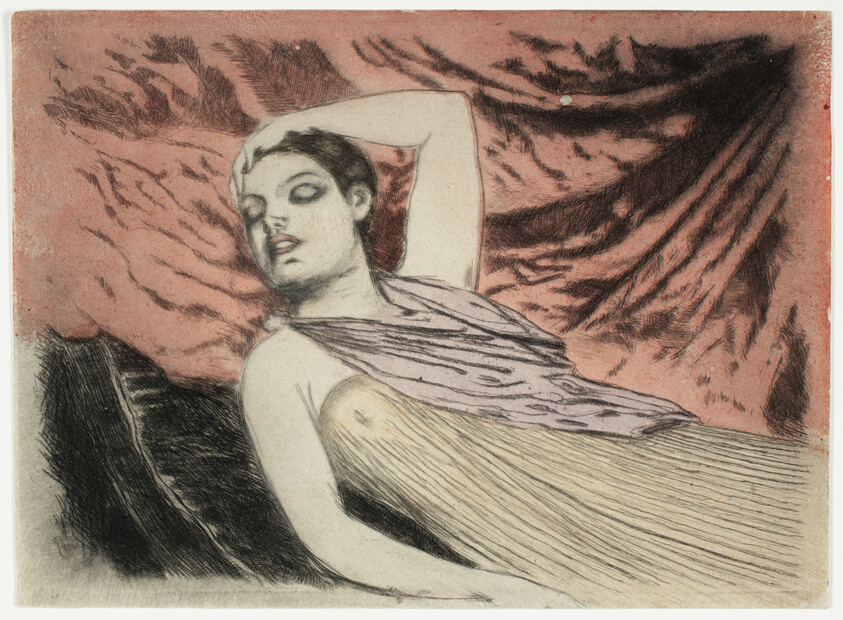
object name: Print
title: The Sleeping Model or The Sleeper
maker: Theodore Roussel (French, worked in England, 1847-1926)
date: 1890–97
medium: Color etching, drypoint, and aquatint, with plate tone, on ivory wove paper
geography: England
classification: aquatint; etching; paper; print; prints and drawing